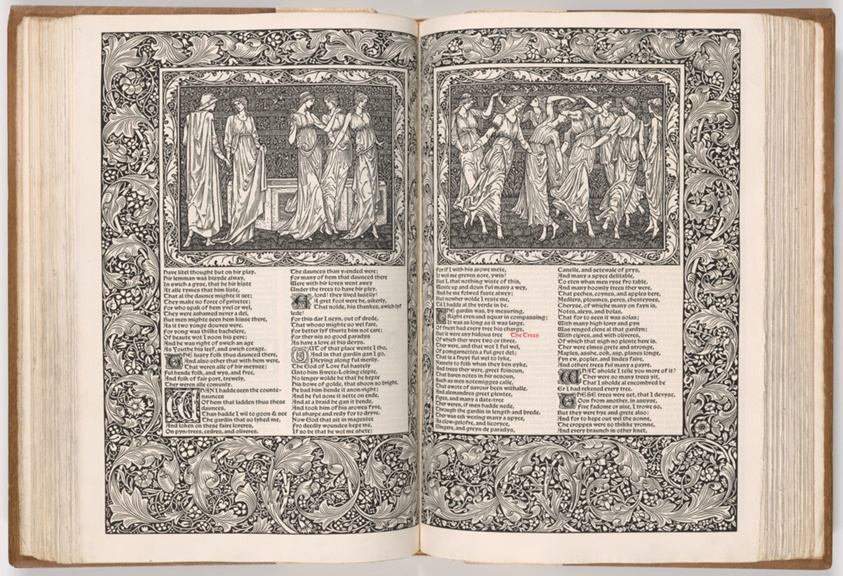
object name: Book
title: The Works of Geoffrey Chaucer Now Newly Imprinted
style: Arts and Crafts Movement, 19th century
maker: William Morris (English, 1834–1896); Illustrated by Sir Edward Burne-Jones (English, 1833-1898); Engraved by William Harcourt Hooper (English, 1834-1912)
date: 1896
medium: Hand-printed book on Batchelor linen paper, bound with tooled white pigskin on oak board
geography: England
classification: book; ink on paper